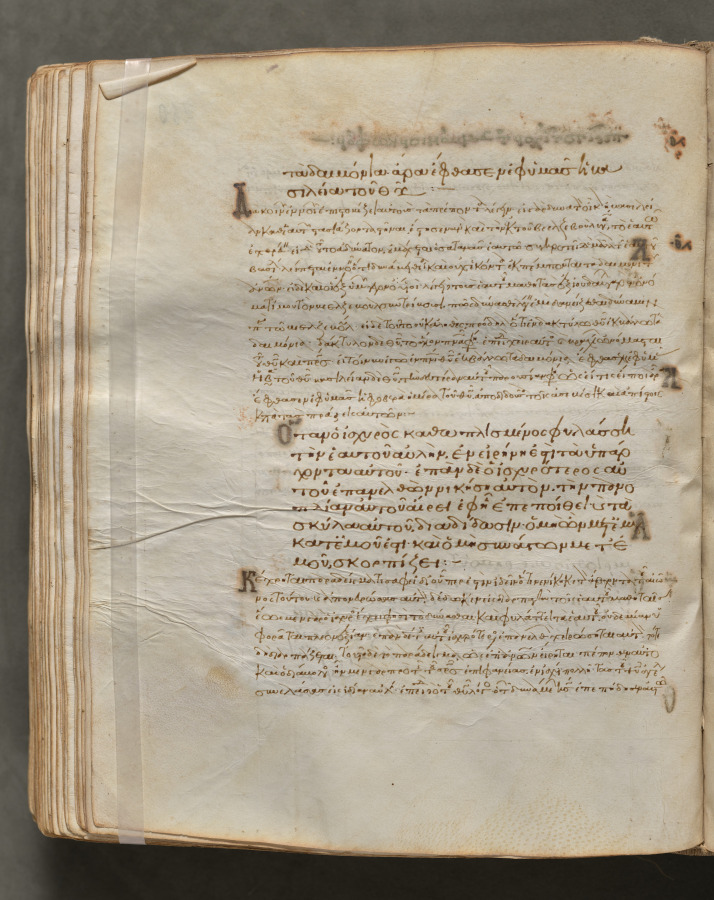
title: Text, folio 260 (verso), from a Gospel Book with Commentaries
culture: Byzantium, Constantinople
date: c. 1000–1100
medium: ink, tempera, and gold on vellum; leather binding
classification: Bound Volume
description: Each of the four gospels in this book opens on a page with brilliantly illuminated borders depicting the author of the text as well as birds—principally peacocks, symbols of the immortality of the soul—and fountains, representing the fountain of life and the salvation of the soul. This volume consists of 428 leaves with texts in Greek. Its level of sophistication suggests that it was probably written and decorated in a monastery in Constantinople.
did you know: Gospel books were carried in procession through Byzantine churches.